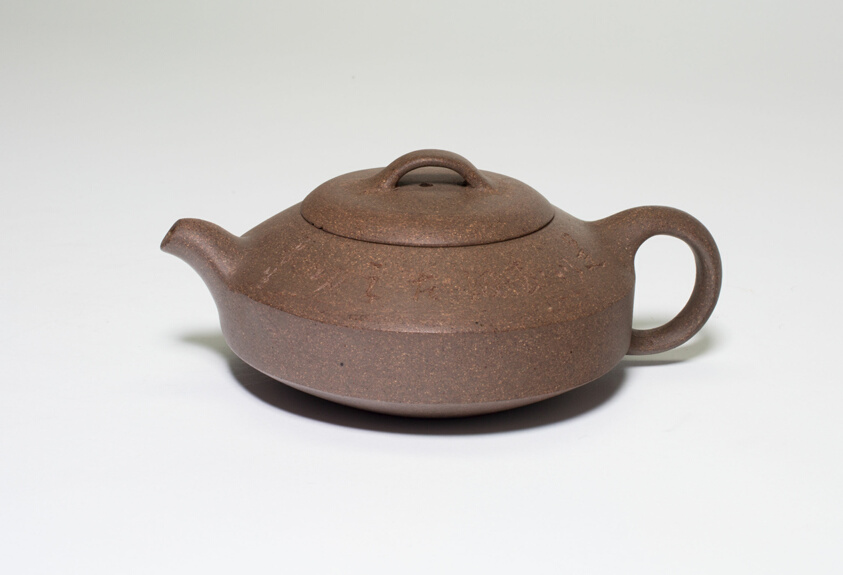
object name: Vessel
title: Teapot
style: Chinese (culture or style)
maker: China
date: Qing dynasty (1644–1911), 18th century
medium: Yixing stoneware with incised decoration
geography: China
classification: teapot; stoneware; ceramics; asian art; vessel